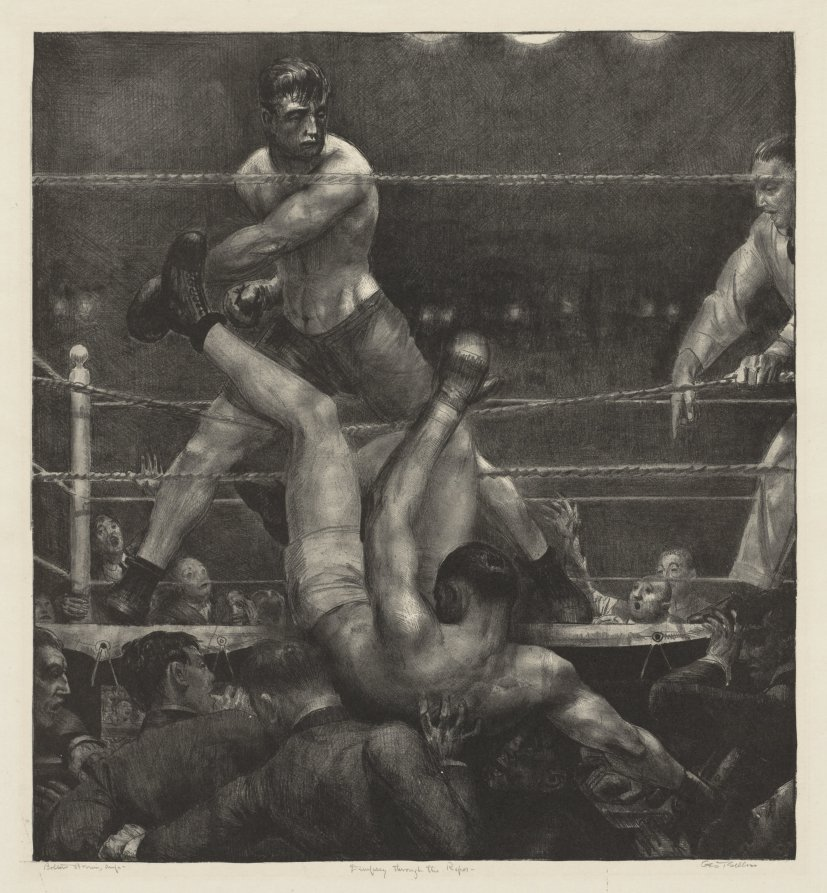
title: Dempsey Through the Ropes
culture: America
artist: George Bellows (American, 1882–1925)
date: 1924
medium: lithograph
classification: Print